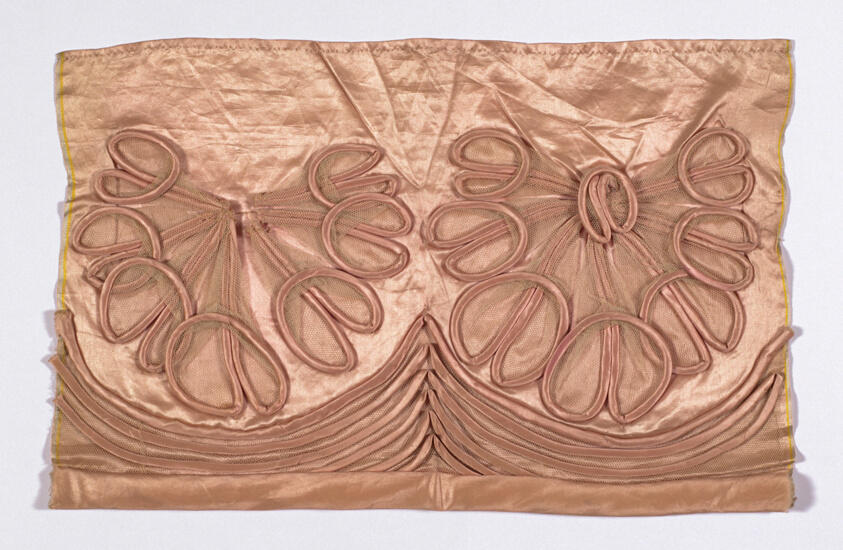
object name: Textile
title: Sample (Dress Trimming)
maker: England or France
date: 1815/35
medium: Silk, satin weave; appliquéd with cordering covered with silk, satin weave and cotton, bobbinet; turned and padded (cotton) hem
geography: France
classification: textile; needlework - costume; weaving